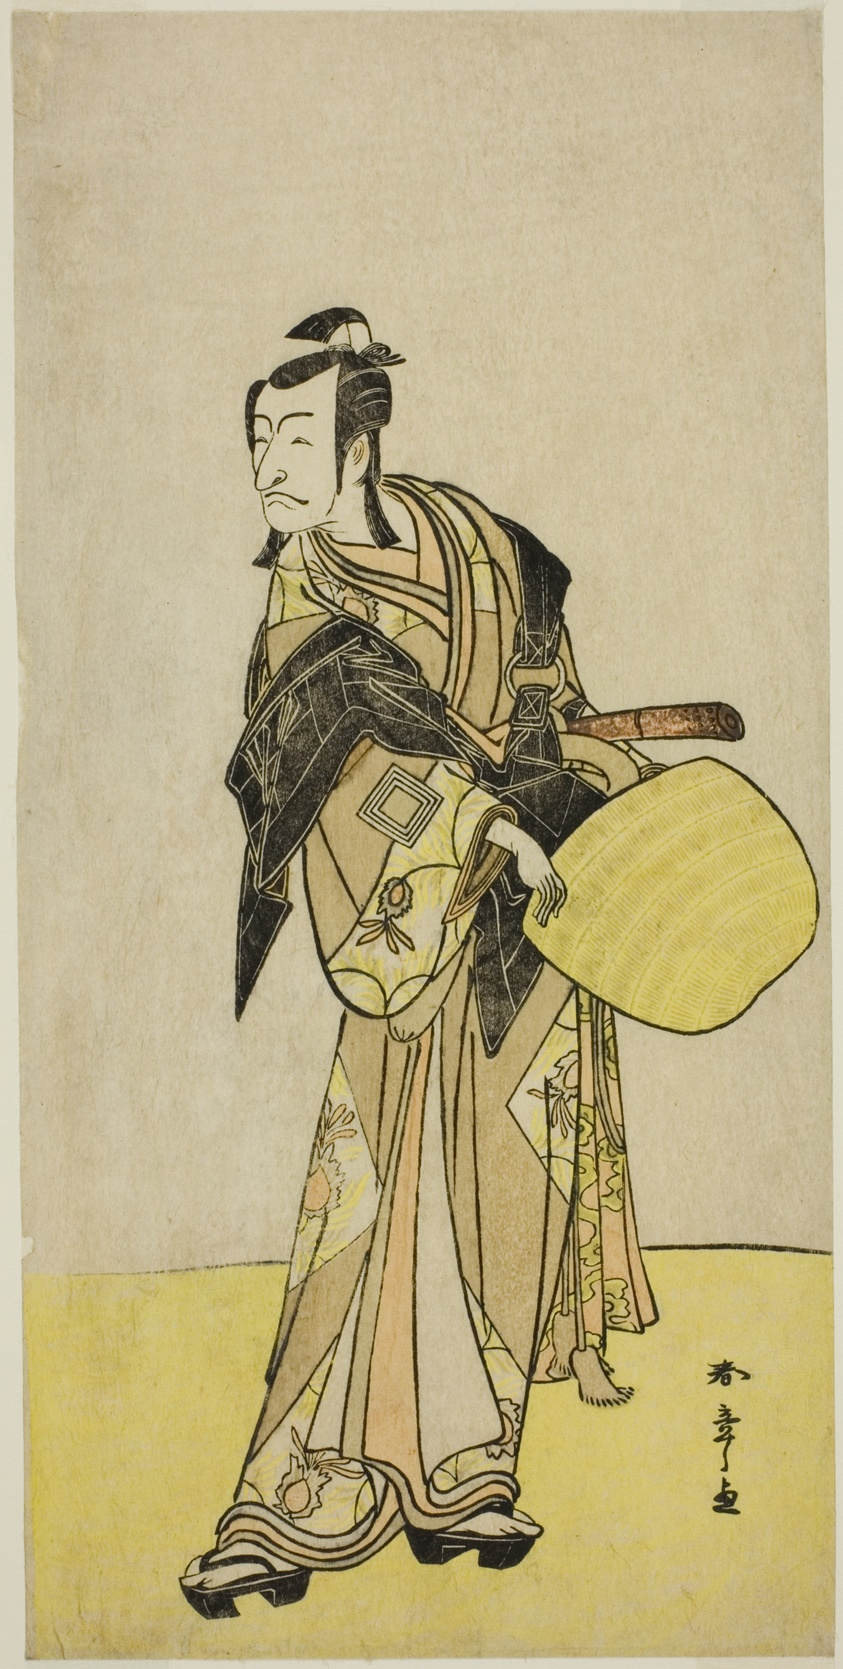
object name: Print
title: The Actor Ichikawa Danjuro V as Kakogawa Honzo, from the play "Kanadehon Chushin Nagori no Kura," performed at the Nakamura Theater in the ninth month, 1780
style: Japanese (culture or style)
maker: Katsukawa Shunsho 勝川 春章; Japanese, 1726-1792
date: c. 1780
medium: Color woodblock print; hosoban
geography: Japan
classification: woodblock print; print; asian art